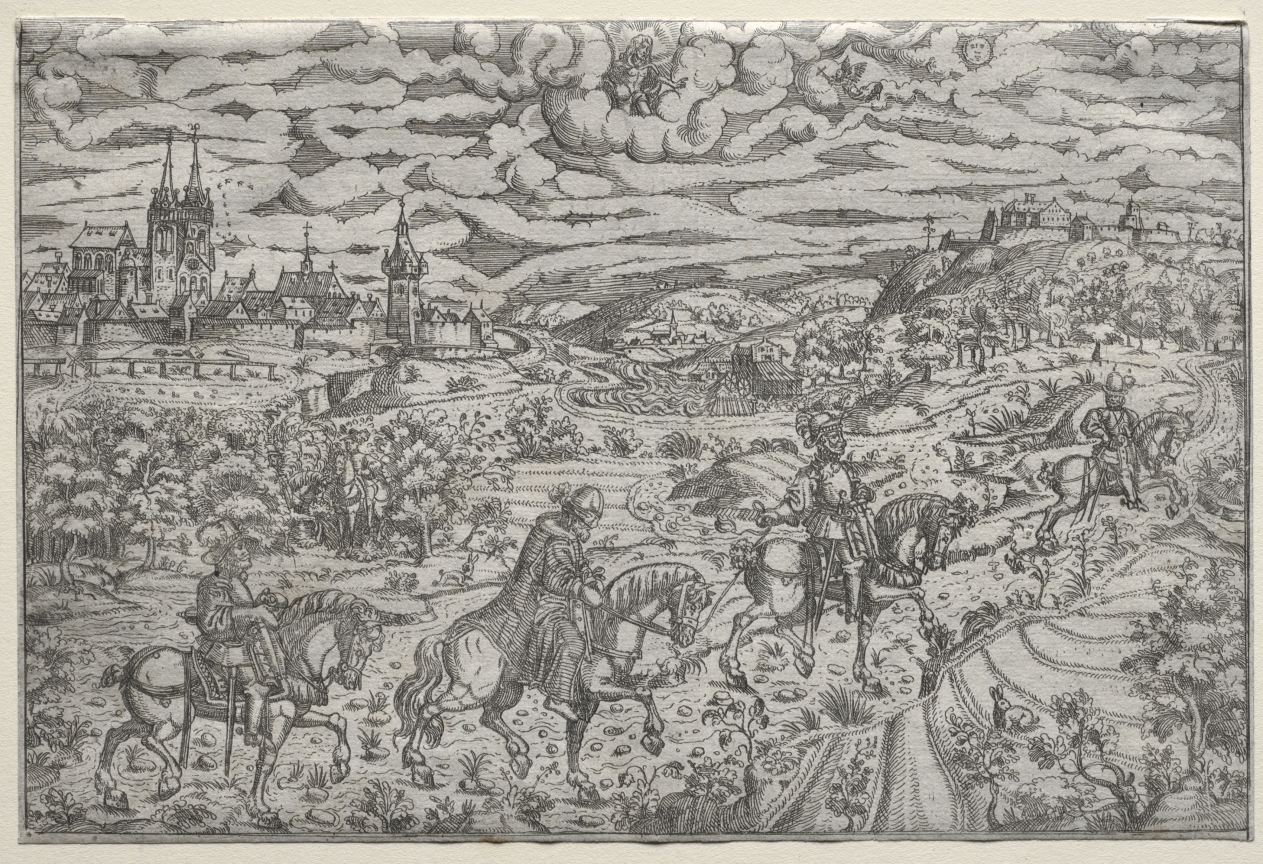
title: The Arrest of Jerome Baumgaertner, Doctor of Nurnberg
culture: Germany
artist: Mathis Zündt (German, c. 1498–1572)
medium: etching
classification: Print